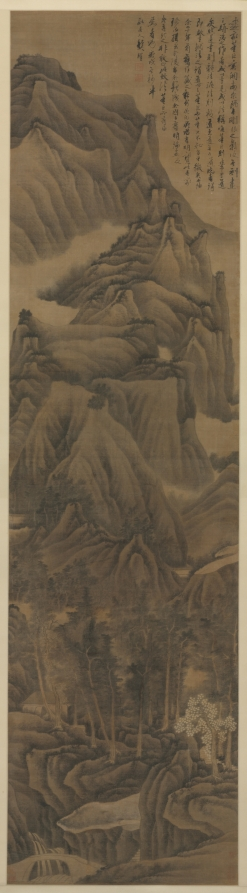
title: Landscape in the Style of Dong Yuan and Juran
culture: China, Qing dynasty (1644-1911)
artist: Gong Xian (Chinese, 1599–1689)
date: c. 1650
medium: hanging scroll, ink with white pigment on silk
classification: Painting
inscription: 畫家董巨，實開南宗。既無剛根之氣，復無刻畫之跡。後之作者或以才見，或以法稱。唯董巨則幾乎道矣。然逞才則離法，泥法則叛道。至道無可道。說者謂即歛才就法之謂道。問之董巨，而董巨不知，忽乎微矣。此幅余二十年前舊作。藏之新安吳氏。吳君晉明寶之若家珍。後携之金陵。命余題識。余因與晉明論畫及此，并紀之。非敢曰此效法董巨而有得焉者也。 庚戌冬杪半畝居人龔賢。 [印]龔半千; 野遺賢; [左下]龔賢; [上]可能另有龔賢一印。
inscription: 2 additional seals of Cheng Qi 程琦 (1911–1988)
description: Towering peaks and unfolding ranges are piled up and overlaid with layer after layer of brushwork to give an overall dense, dark, and even melancholic effect. Gong Xian created a personal style of landscape, which departed greatly from his models Dong Yuan and Juran. The tension between tradition and individuality had been a topic of interest for the Chinese artist. As Gong Xian writes in his inscription: "Painters of later periods may be known for their natural talents or praised for their observance of established traditions. . . . However, those who indulge in showing off their talent will deviate from the tradition, while those who adhere to tradition will alienate themselves from the Dao. The supreme Dao is inexplicable in words. . . ."